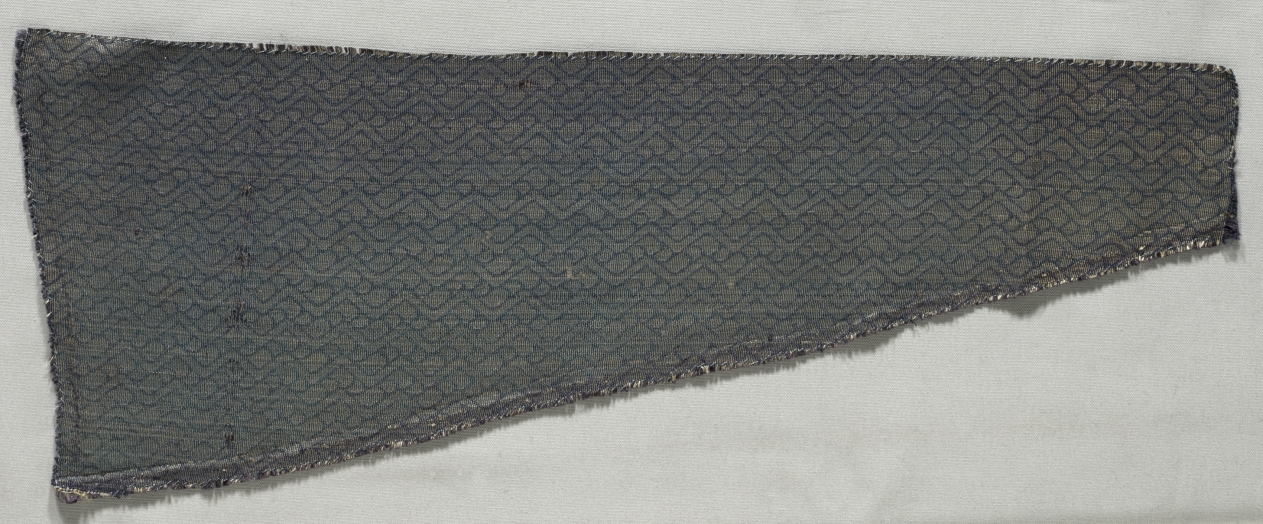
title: Silk Fragment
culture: Italy, 17th century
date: 1600s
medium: silk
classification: Textile